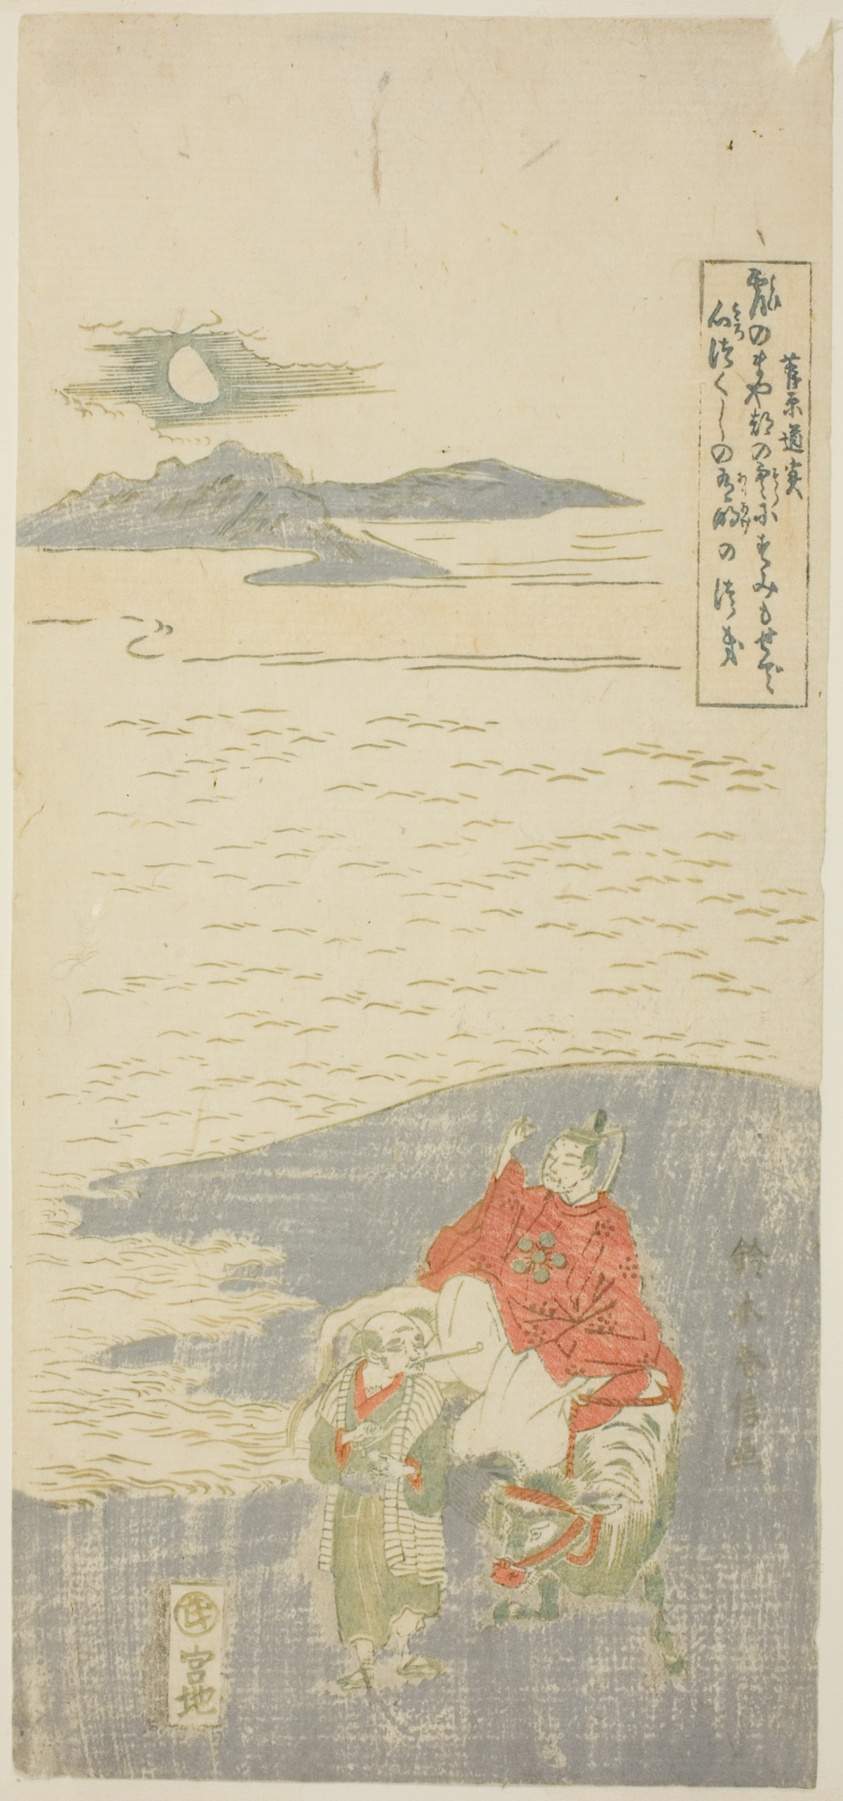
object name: Print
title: Sugawara Michizane Going into Exile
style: Japanese (culture or style)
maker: Suzuki Harunobu 鈴木 春信; Japanese, 1725 (?)-1770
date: c. 1763/64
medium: Color woodblock print; hosoban, mizu-e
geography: Japan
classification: woodblock print; print; asian art